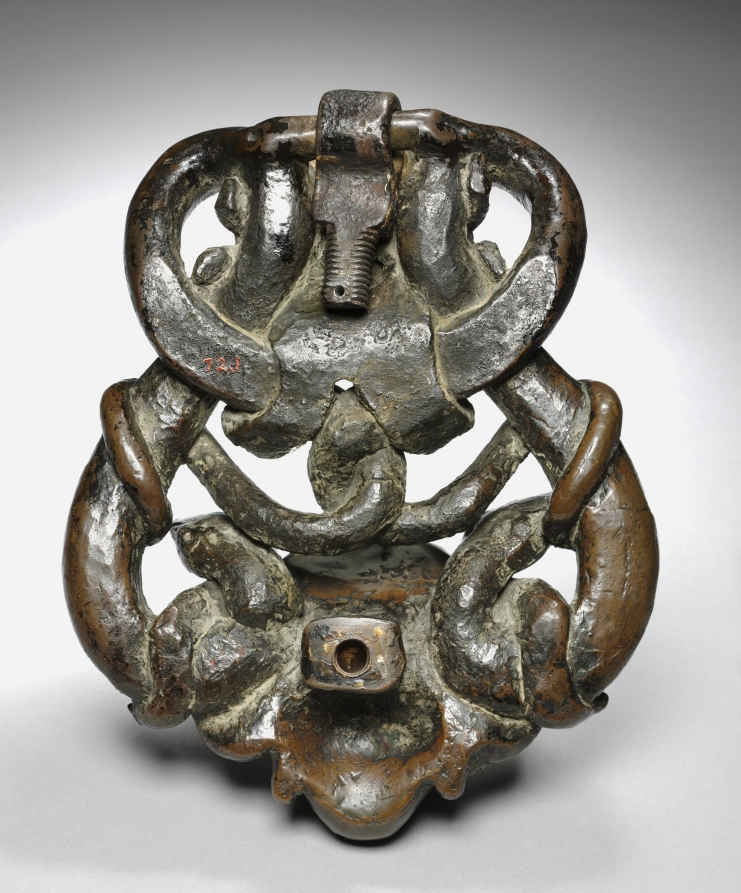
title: Doorknocker with Gorgon Head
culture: Italy, Venice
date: mid-1500s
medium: bronze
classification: Sculpture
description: Venice was a center for numerous bronze founders who made elaborate doorknockers for palace doors throughout the city. Although utilitarian, these objects were meant to impress as works of art in their own right. The presence of snakes that coil from this fearsome head suggest that this is Medusa, one of the three demon sisters in Greek mythology known as the Gorgons. According to some legends, Medusa was an attractive woman who, after having an affair with the god Poseidon in Athena's temple, was transformed by the goddess into a serpent-haired beast. Her visage was so terrifying that anyone who looked at it was turned to stone. The hero Perseus was ordered to decapitate Medusa, and Athena subsequently placed the monstrous head in the center of her shield. The use of the Gorgon's head as an ancient motif and protective symbol to avert evil developed from this fabled act. Such literary and iconographic traditions were known to Renaissance artists, and the presence of a Gorgon head on a doorknocker almost certainly evokes its guarding function for a Venetian home.